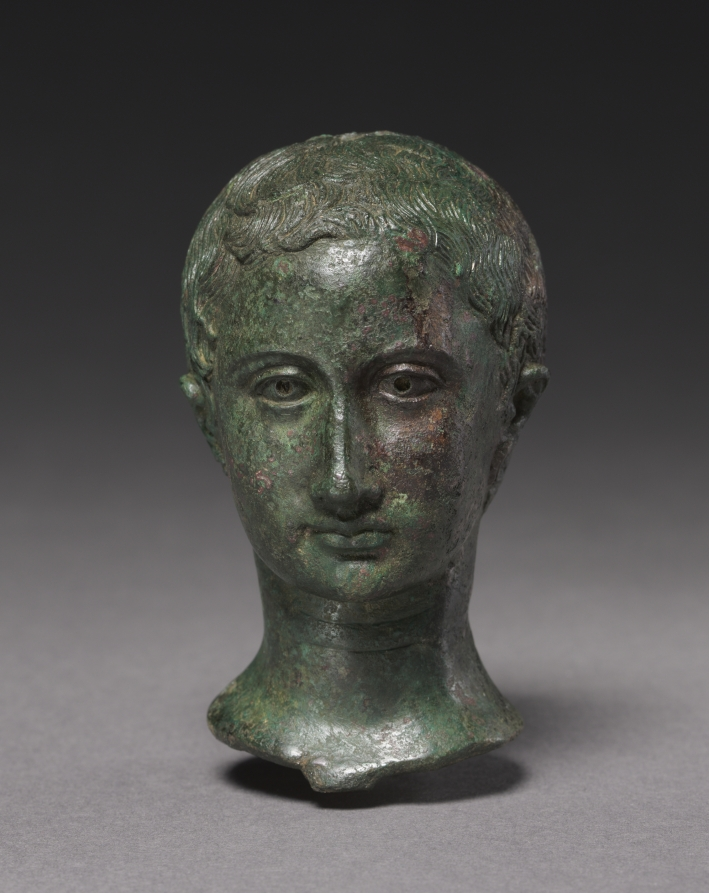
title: Portrait of a Young Girl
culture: Italy, Eastern Roman Empire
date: c. 25–30 CE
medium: bronze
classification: Sculpture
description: This bronze portrait has a boyish close-cropped hairstyle and rounded forehead. The irises of the eyes are now hollow but were once inlaid with material, possibly glass. The head was likely set into a body or bust and placed inside a tomb. This portrait head is distinctive for the particular arrangement of the comma-shaped locks of hair, which resembles portraiture during the later period of the reign of Tiberius (AD 25–30), a Julio-Claudian emperor. Some scholars believe that the earrings identify the figure as an Armenian prince, while others believe this to be a portrait of a young girl.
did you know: The earrings this young girl wears are similar to a pair in the CMA collection (1985.174).